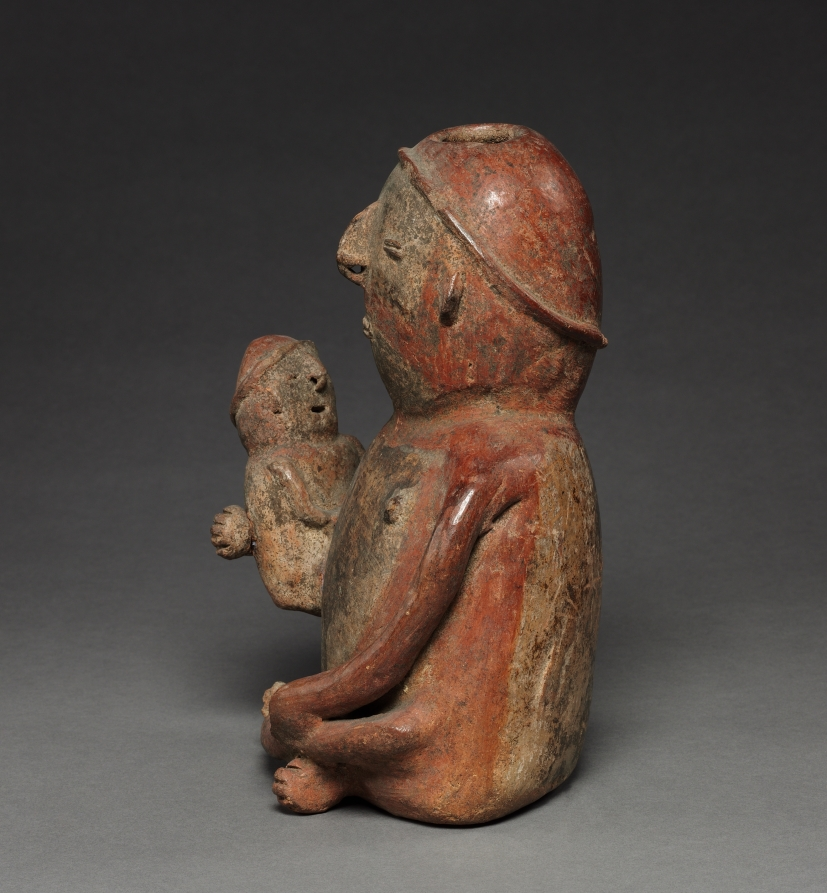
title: Figures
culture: Colombia, 18th-19th century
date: before 1921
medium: red ware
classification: Ceramic